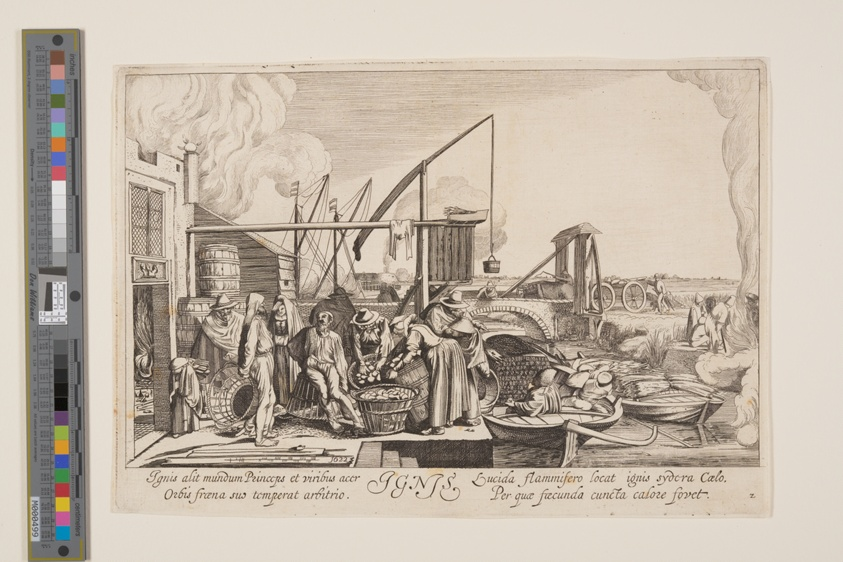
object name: Print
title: Fire, from The Four Elements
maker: Jan van de Velde II (Dutch, c. 1593–1641); after Willem Buytewech (Dutch, 1591/92-1624)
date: 1622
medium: Etching on ivory laid paper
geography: Netherlands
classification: print; paper; prints and drawing; etching